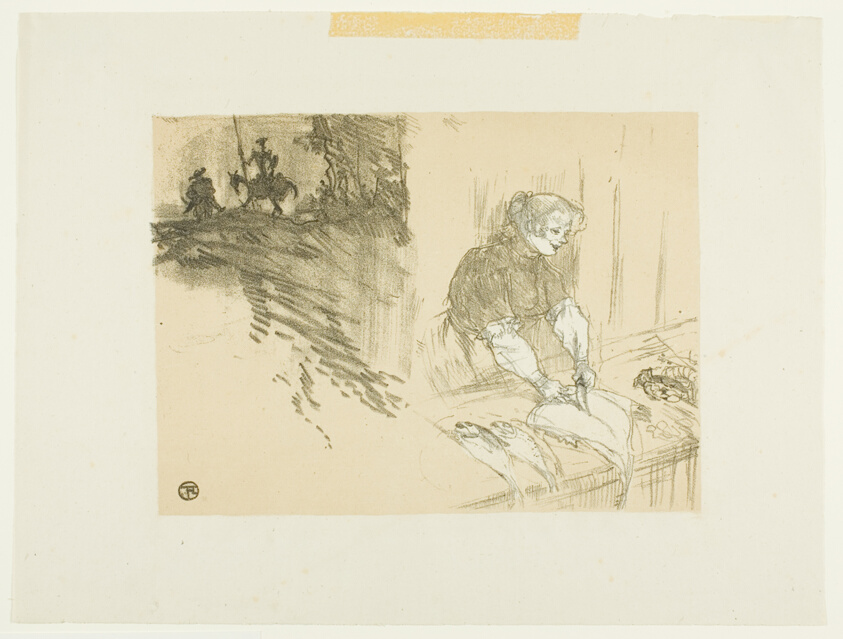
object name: Print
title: Cover for Les Courtes Joies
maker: Henri de Toulouse-Lautrec (French, 1864-1901)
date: 1897, published 1925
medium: Lithograph with beige tint stone, on ivory laid paper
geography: France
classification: lithograph; print; prints and drawing